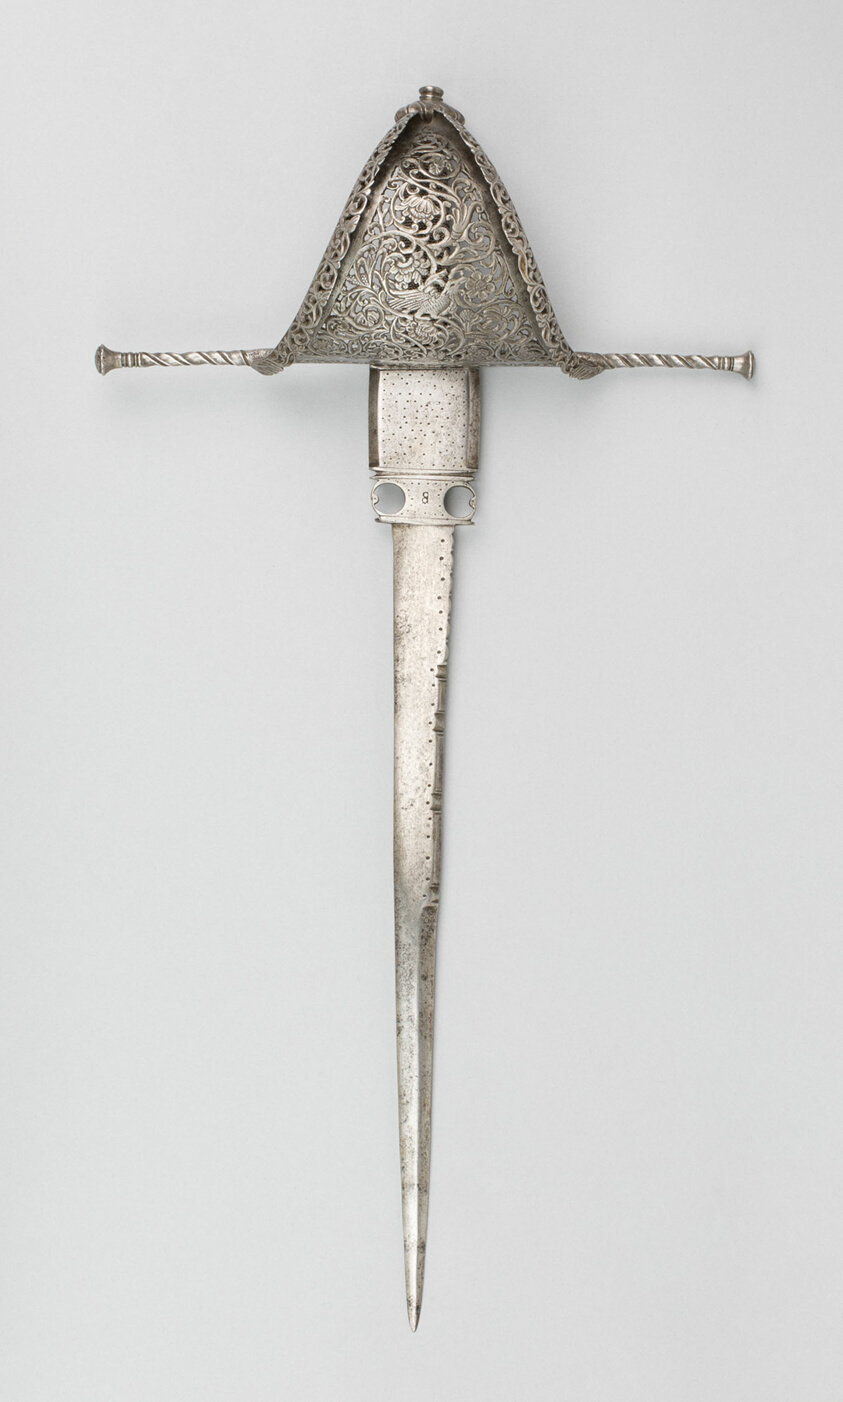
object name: Arms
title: Parrying Dagger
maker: South Italian or Spanish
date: 1650/60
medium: Steel, iron, and wood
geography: Italy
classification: edged weapon-dagger; arms; arms and armor